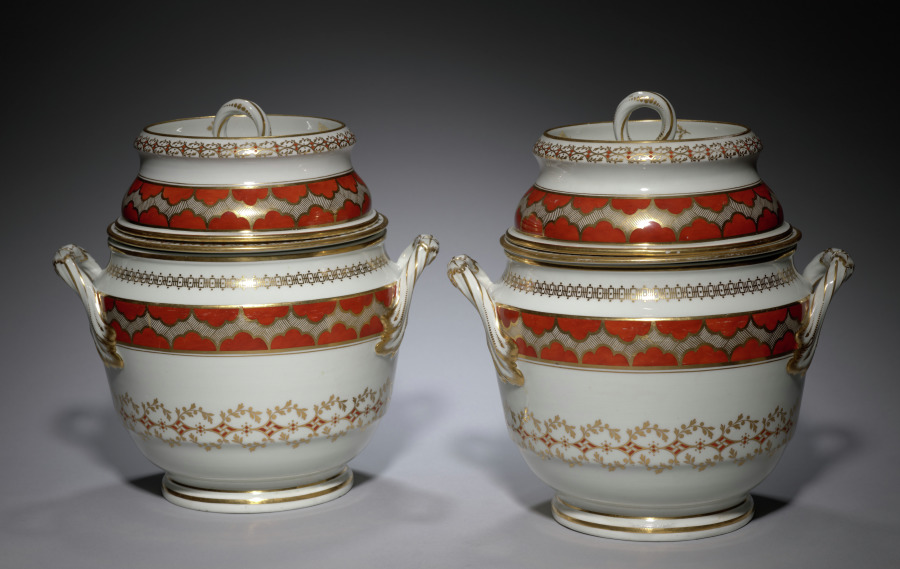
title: Pair of Ice Pails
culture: England, late 18th-early 19th Century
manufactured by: Flight & Barr (British)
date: 1793–1807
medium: porcelain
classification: Ceramic